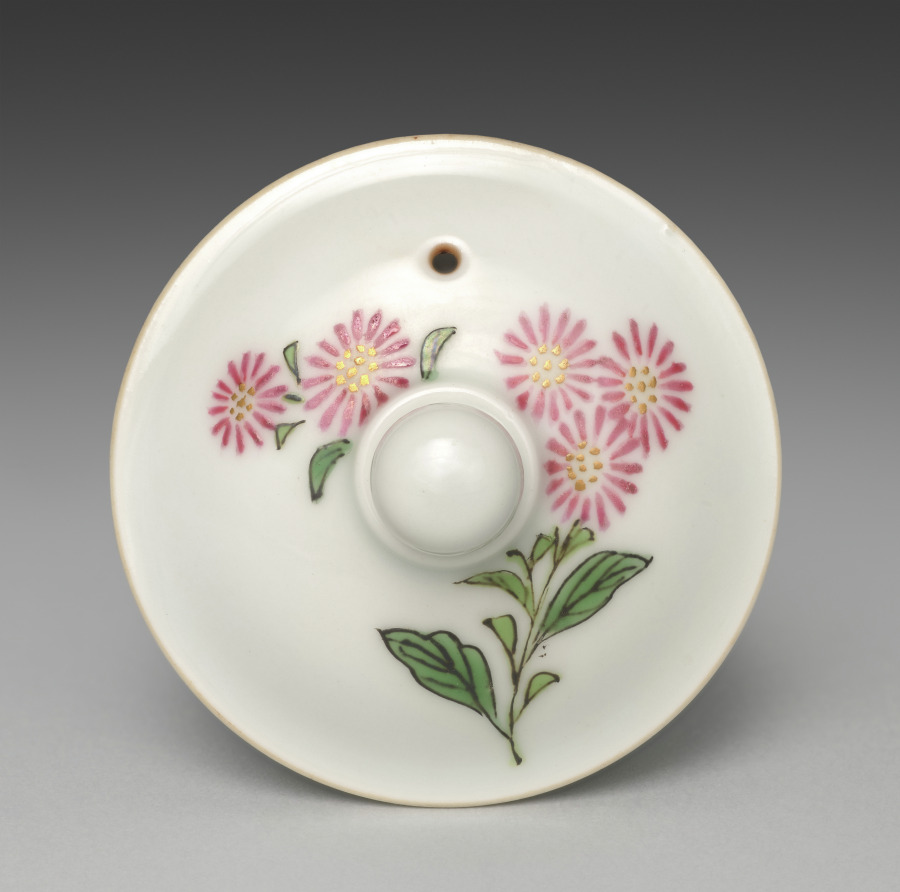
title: Lid for a Teapot with Chrysanthemums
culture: Japan, Meiji period (1868–1912)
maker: Seifū Yohei III (Japanese, 1851–1914)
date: 1912–14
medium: Porcelian with overglaze enamel and gold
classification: Ceramic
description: This teapot with recessed lid has a bold, realistic design of pale yellow and white chrysanthemums rendered in overglaze color enamels and dotted gold centers. Black contour lines define the yellow and white flowers and their green stems and leaves. Small pink and purple chrysanthemums are rendered as simple motifs, their shapes defined in contrast to the white ground of the pot.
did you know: This side-handled teapot is designed for brewing and serving sencha.